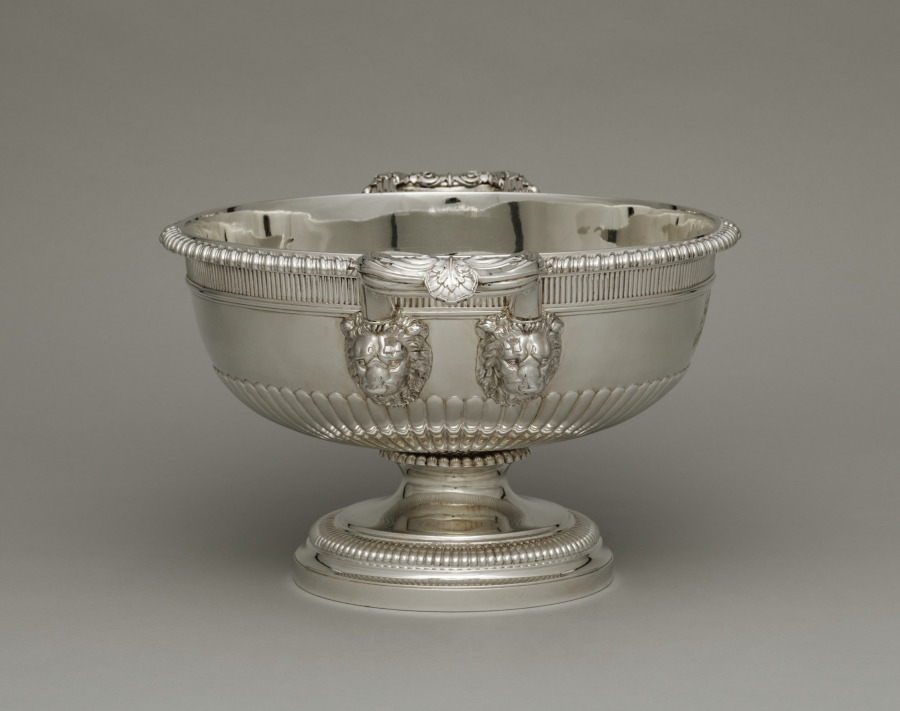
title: Tureen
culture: England, London, 19th century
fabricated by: Paul Storr (British, 1771–1844)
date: 1812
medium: silver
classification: Silver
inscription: coat of arms: Hutton impaling Chaytor; crest: Hutton. (Arms of Timothy Hutton (1729-1864) of Marske and Clifton Castle, Yorkshire, and his wife Elizabeth Chaytor of Spennithorne Hall, who were married in 1804.)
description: Silver fulfilled a prominent role in projecting wealth, status, power, and ritual in British life during the 1600s and 1700s. Elaborate forms such as this tureen, with its acanthus leaves and fluted detailing, not only represented wealth in its sheer silver weight but also provided royal and aristocratic owners a surface for displaying engraved coats of arms. The arms of the High Sheriff of Yorkshire, Timothy Hutton and his wife Elizabeth Chaytor of Spennithorne Hall in northern England are engraved on this tureen by Paul Storr, one of the most prominent London silversmiths of the period.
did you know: This tureen is accompanied by a cover and stand. See cover record.